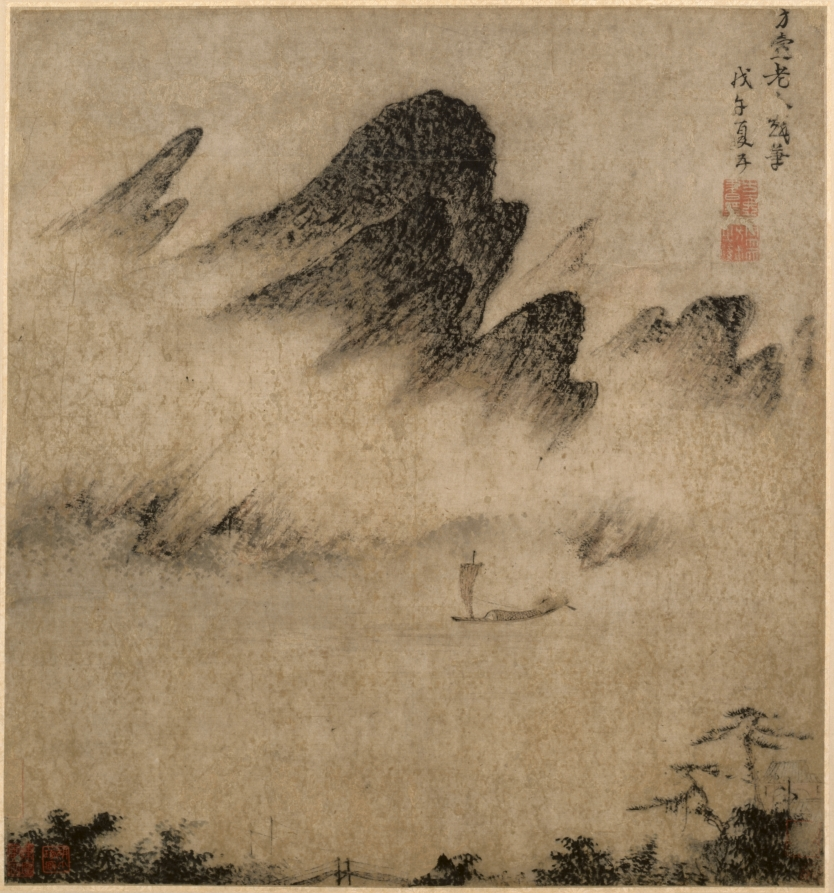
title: Landscape Ink-Play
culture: China, Yuan dynasty (1271-1368)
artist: Fang Congyi (Chinese, active c. 1340–80)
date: 1300s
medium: hanging scroll; ink and color on paper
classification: Painting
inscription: Inscription and 2 seals in the upper right. 2 complete seals and 1 partial in the lower left.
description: The painter created a paradoxical juxtaposition of the boat serenely sailing against the turbulent onrushing movement of the towering mountains in the background.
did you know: Fang Congyi was a painter and a Daoist priest.